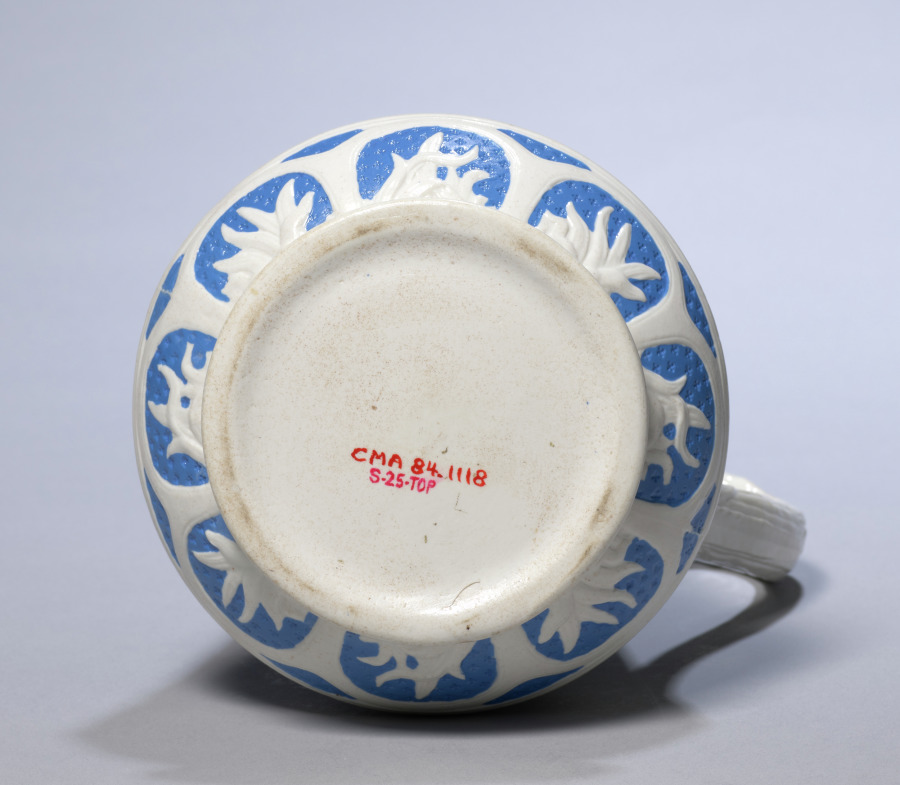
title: Jug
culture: England, Staffordshire, Burslem, 19th century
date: 1850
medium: parian ware with metal rim and cover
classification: Ceramic